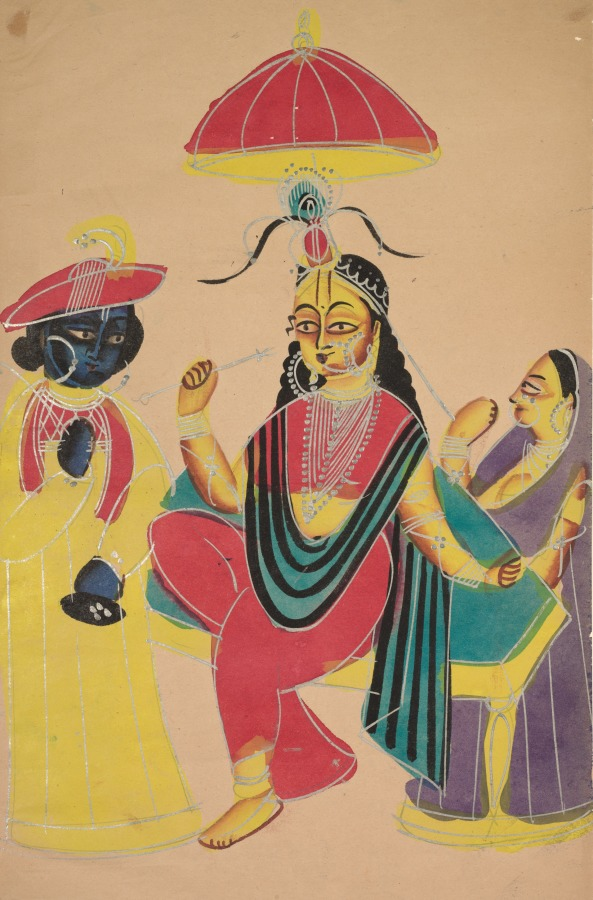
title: Krishna Standing by Radha who is Seated on a Chair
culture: Eastern India, Bengal, Kolkata, Kalighat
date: c. 1890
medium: Gum tempera, graphite, ink, and tin on paper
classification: Painting